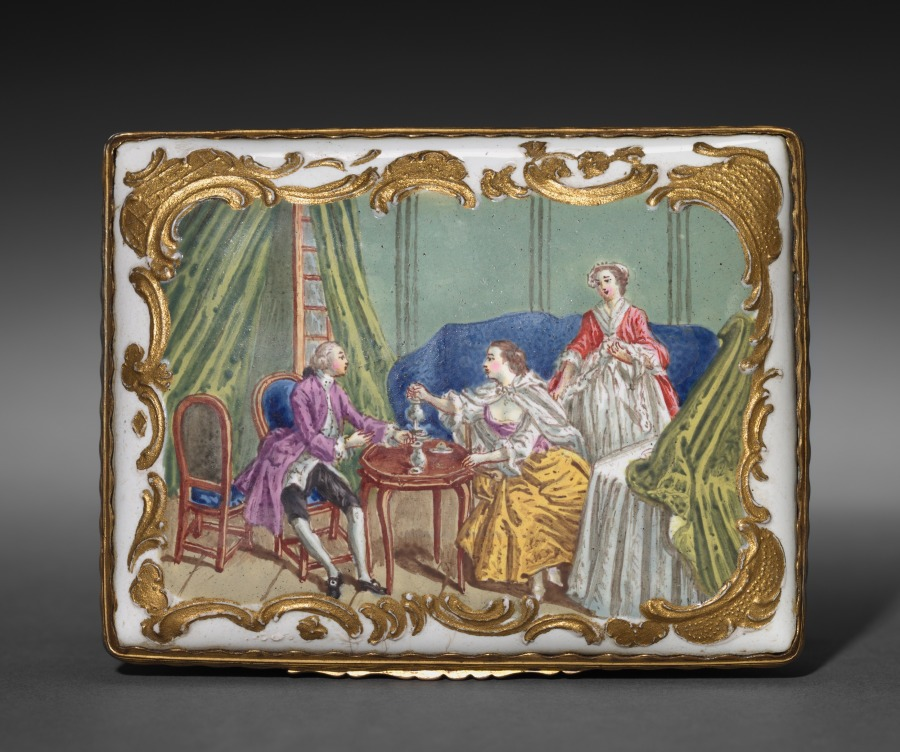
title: Box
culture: England, 18th century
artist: South Staffordshire Factory (British)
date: 1760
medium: enamel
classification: Enamel